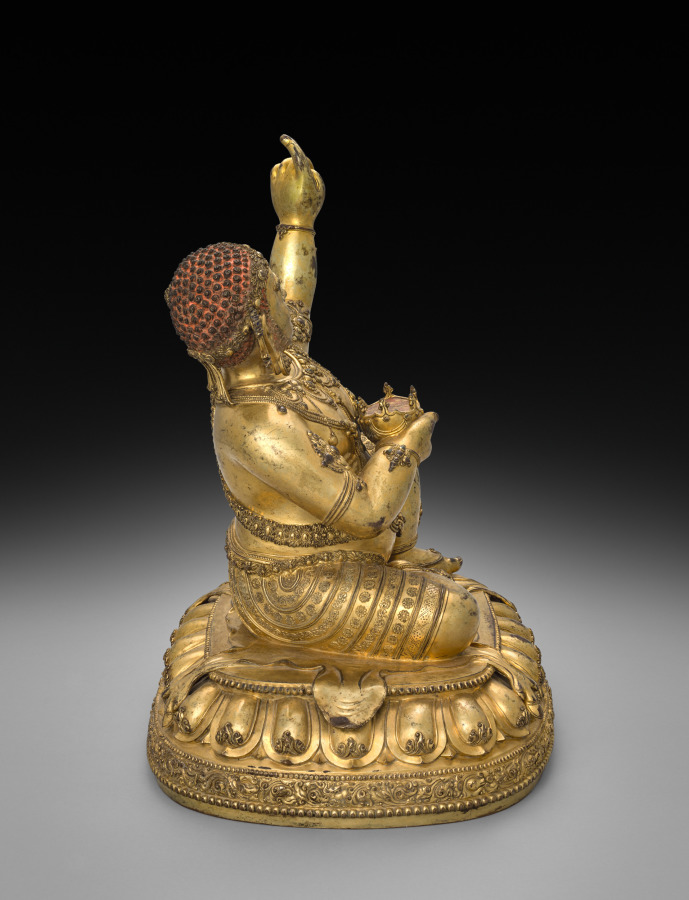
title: Virupa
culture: China, Ming dynasty (1368-1644), Yongle reign (1403-1424)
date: early 1400s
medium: Gilt bronze with silver, stones, and pigment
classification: Sculpture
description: Virupa is one of the great teachers in the history of tantric Buddhism. His posture references his ability to stop the sun; as an enlightened being, he can control phenomena of nature. As a tantric practitioner, he overturns ordinary assumptions about proper behavior, so he overeats, drinks large quantities of liquor, and waits for the king to pay his bill at the tavern. At the edge of the lotus pedestal is an inscription identifying the image as having been made in the imperial kilns of the third emperor of the Ming dynasty in China as a gift to a Tibetan monastic leader. While closely linked to Tibetan styles, the luxurious detailing, special gilding process, and the casting of the ornaments onto the body without use of inlay are specifically Chinese characteristics.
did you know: Virupa's clothing and jewelry are embellished with silver and stones, while pigments enhance his hair and eyes.